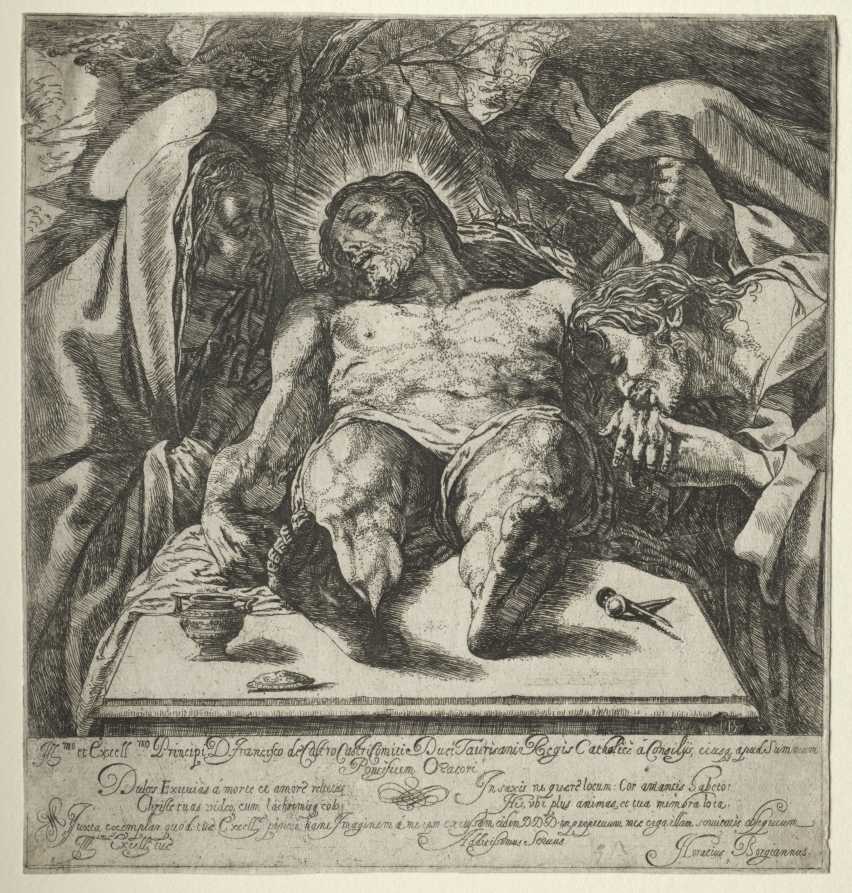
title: The Lamentation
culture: Italy, late 16th-early 17th century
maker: Orazio Borgianni (Italian, 1568–1616)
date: 1615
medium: etching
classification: Print